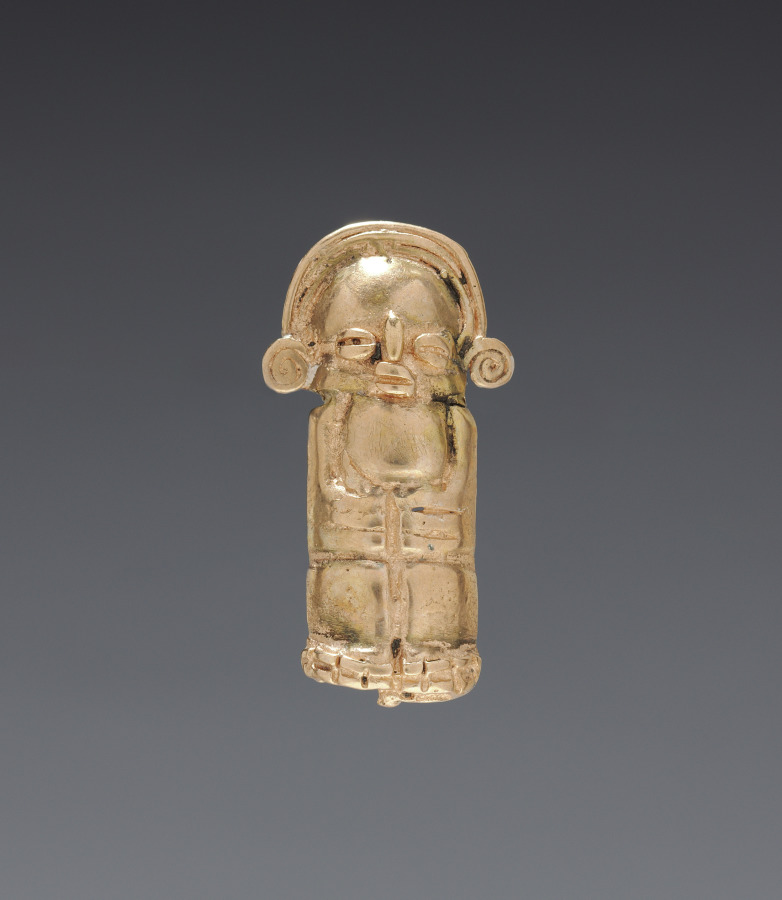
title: Necklace Figurine Bead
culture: Colombia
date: 1–700 CE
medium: cast gold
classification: Jewelry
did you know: Working with gold dates back to at least 500 BC in Ecuador and Colombia.